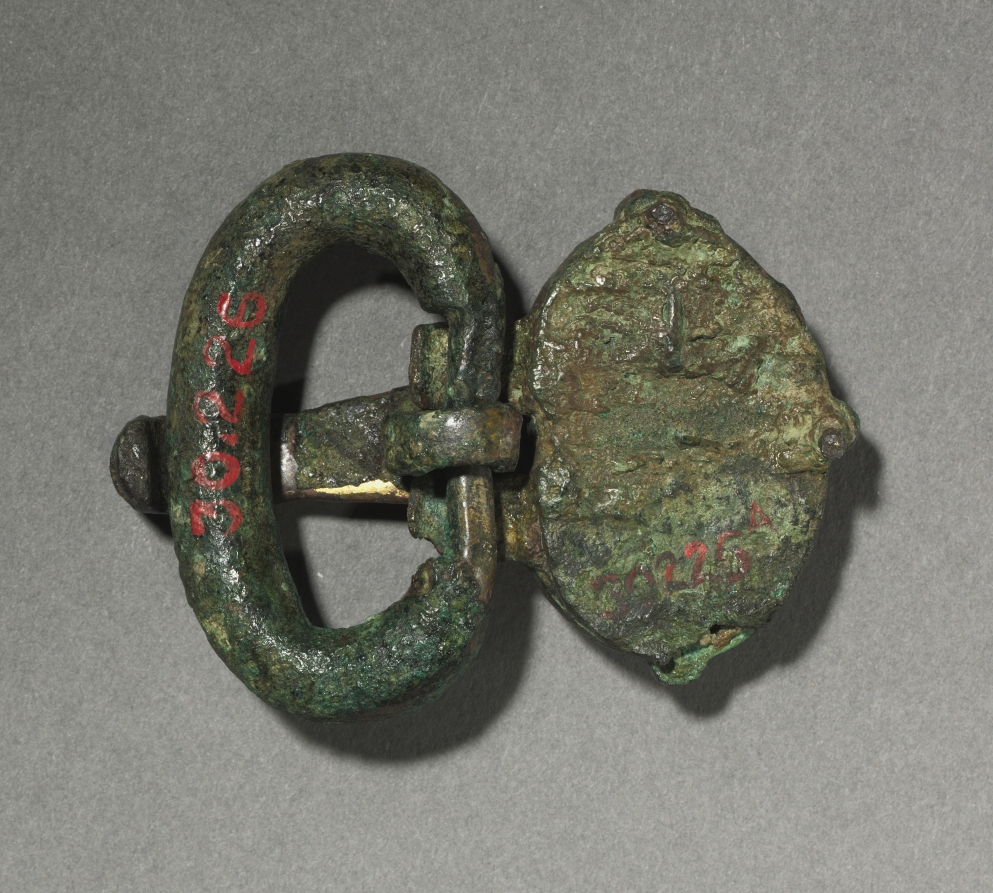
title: Buckle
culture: Hunnish, Migration Period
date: 400s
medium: bronze, traces of gilding, and garnets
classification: Jewelry